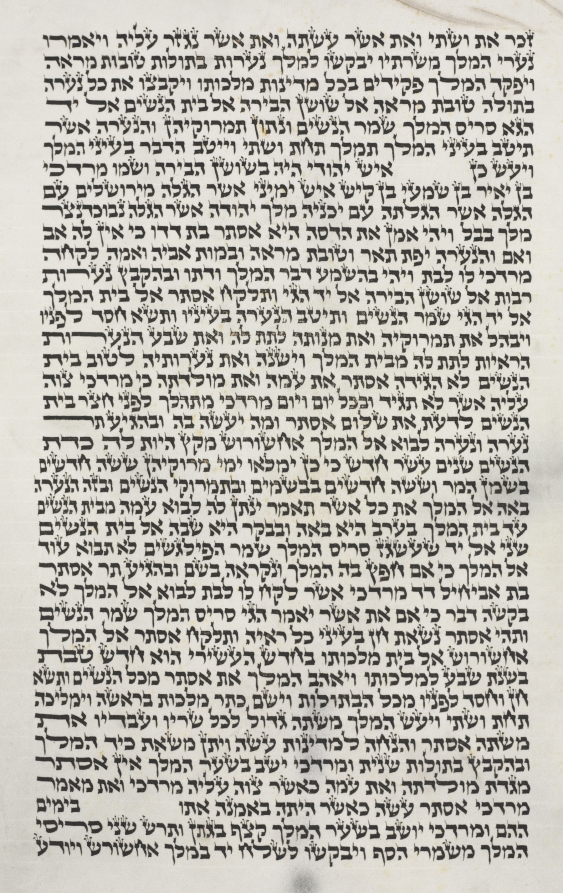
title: Scroll of Esther for the Purim Festival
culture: Europe (Eastern?), Hebrew, 19th century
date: c. 1850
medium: ink on vellum (eight columns, 39 lines of text on three membranes)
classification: Manuscript